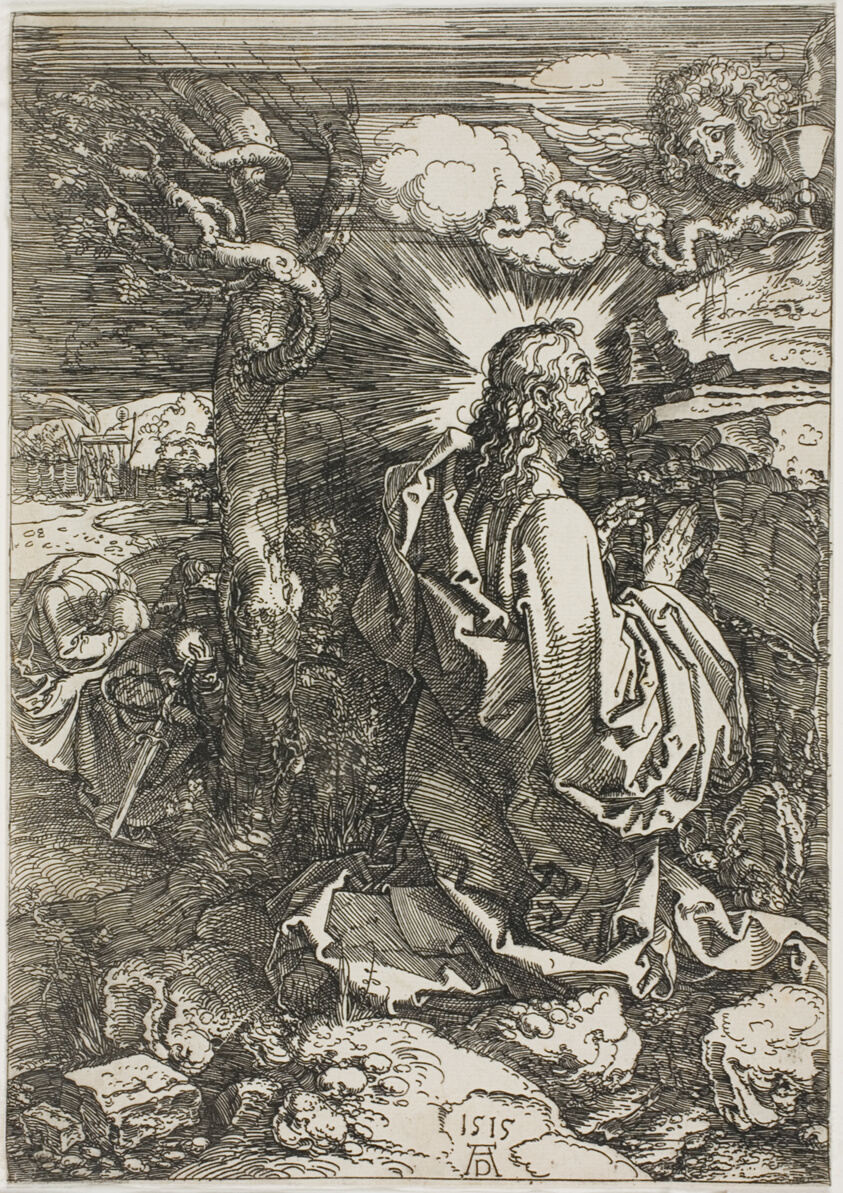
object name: Print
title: Agony in the Garden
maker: Albrecht Dürer (German, 1471-1528)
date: 1515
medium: Etching in black on ivory laid paper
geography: Germany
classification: etching; print; prints and drawing; paper